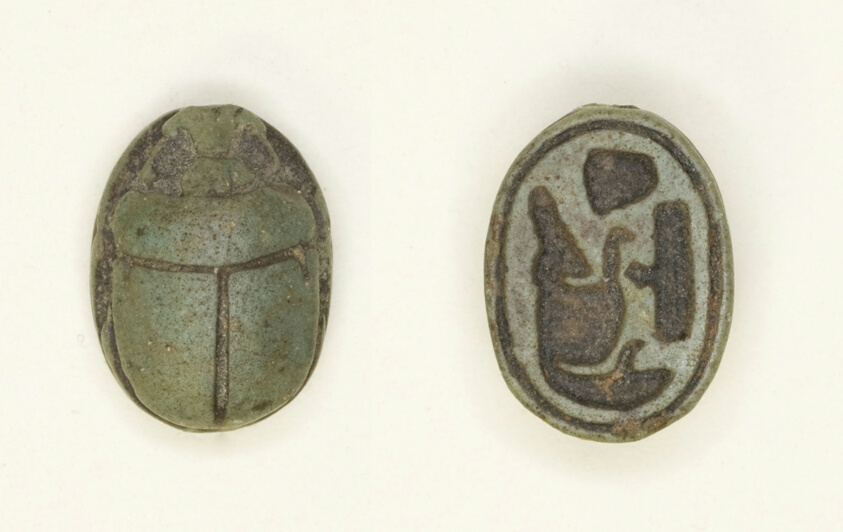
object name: Costume and Accessories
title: Scarab: Sobekhotep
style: new kingdom, egyptian, ancient, eighteenth dynasty, nineteenth dynasty, twentieth dynasty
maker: Egyptian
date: New Kingdom, Dynasty 18–20 (about 1550–1069 BCE)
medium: Glazed steatite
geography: Egypt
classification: scarab; stone; ancient art; costume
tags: Hieroglyphs, crocodiles, insects